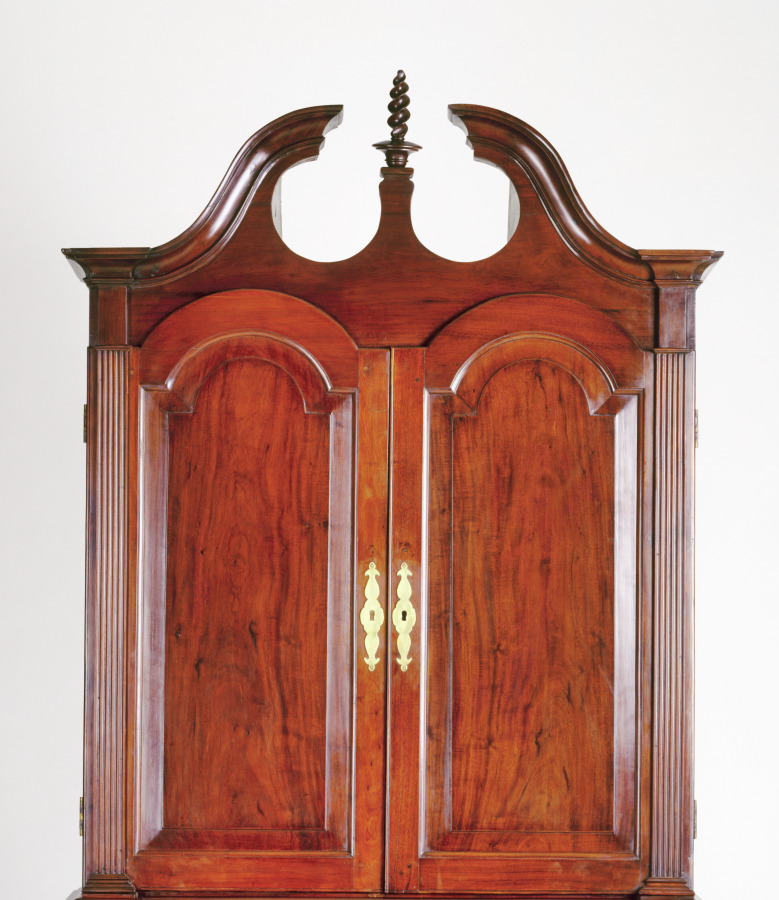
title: Bookcase Section of a Desk and Bookcase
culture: America, Massachusetts, Boston or vicinity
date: c. 1780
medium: mahogany and pine, brass hardware, gilding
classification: Furniture and woodwork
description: During the 1700s, a desk and bookcase, sometimes called a bureau in early inventories, was among the largest and most expensive pieces of furniture in a household. Their owners were chiefly businessmen and community leaders, and because of their function as repositories for personal letters and documents, they were usually placed downstairs in a back parlor or hall. A desk and bookcase consisted of two parts: usually a slant-top desk below and a cabinet above that sat within moldings applied to the desktop to hold it in place. The form often included elements derived from contemporary architecture. Like much New England furniture of the later 1700s, the lower section of this example is block-fronted, in which the profile recedes in the center and protrudes at either side. Though some European precedents can be found for block fronting, this type of cabinetry was clearly more popular in America than anywhere else.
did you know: This bookcase is the upper section of a desk and bookcase. A desk and bookcase in the 1700s, often equipped with several locks and keys as in this example, served as a self-contained office for the gentleman of the household.